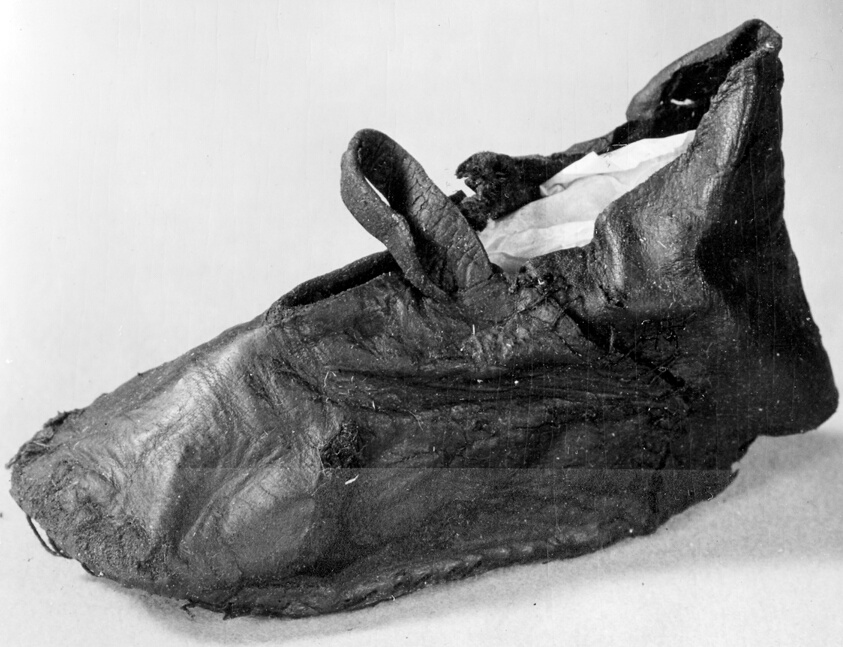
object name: Costume and Accessories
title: Child's Boot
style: elizabethan, tudor, european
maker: England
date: 16th century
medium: Leather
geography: England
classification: textile; costume accessory - shoe; shoes - misc; costume; dress (garment); clothing